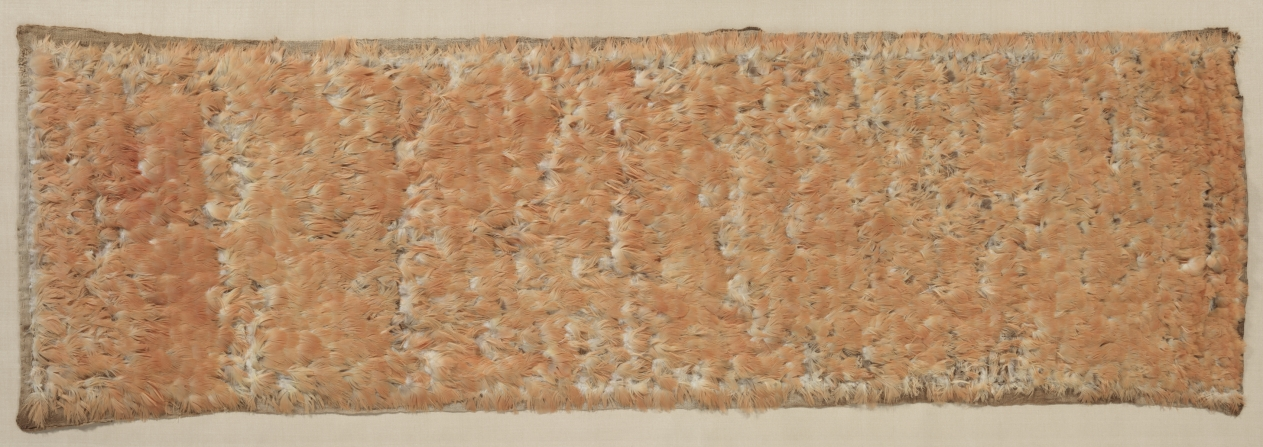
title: Feathered Panel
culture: Andes, 7th-15th century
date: 600–1500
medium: feather "mosaic": feathers sewed on coarse cotton cloth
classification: Textile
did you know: To decorate this textile, feathers were tied to strings and the strings were stitched on in overlapping rows.